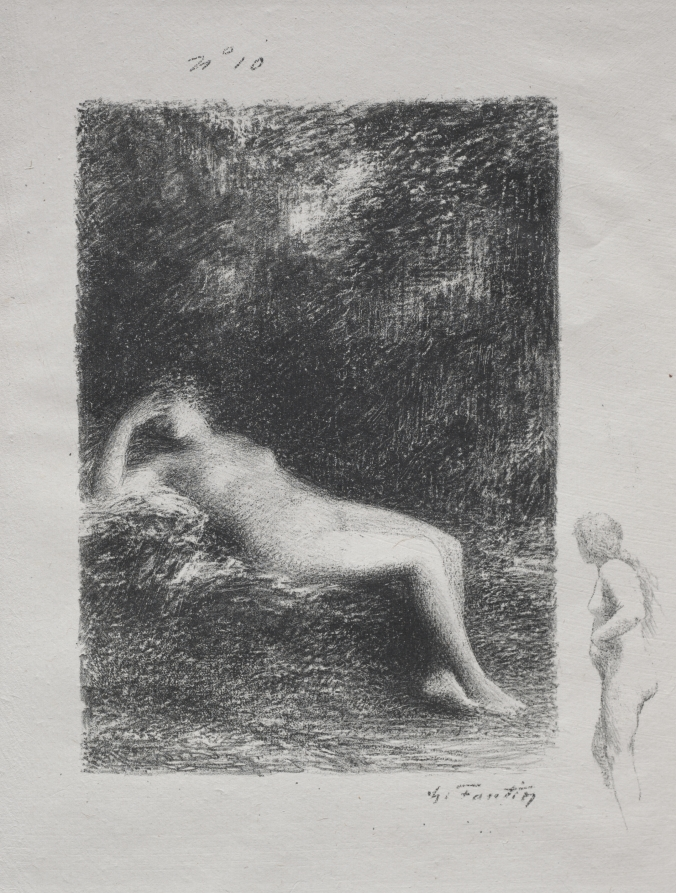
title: XXVII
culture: France, 19th century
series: Illustrations for the Poems of André Chénier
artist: Henri Fantin-Latour (French, 1836–1904)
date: c. 1905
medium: lithograph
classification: Print